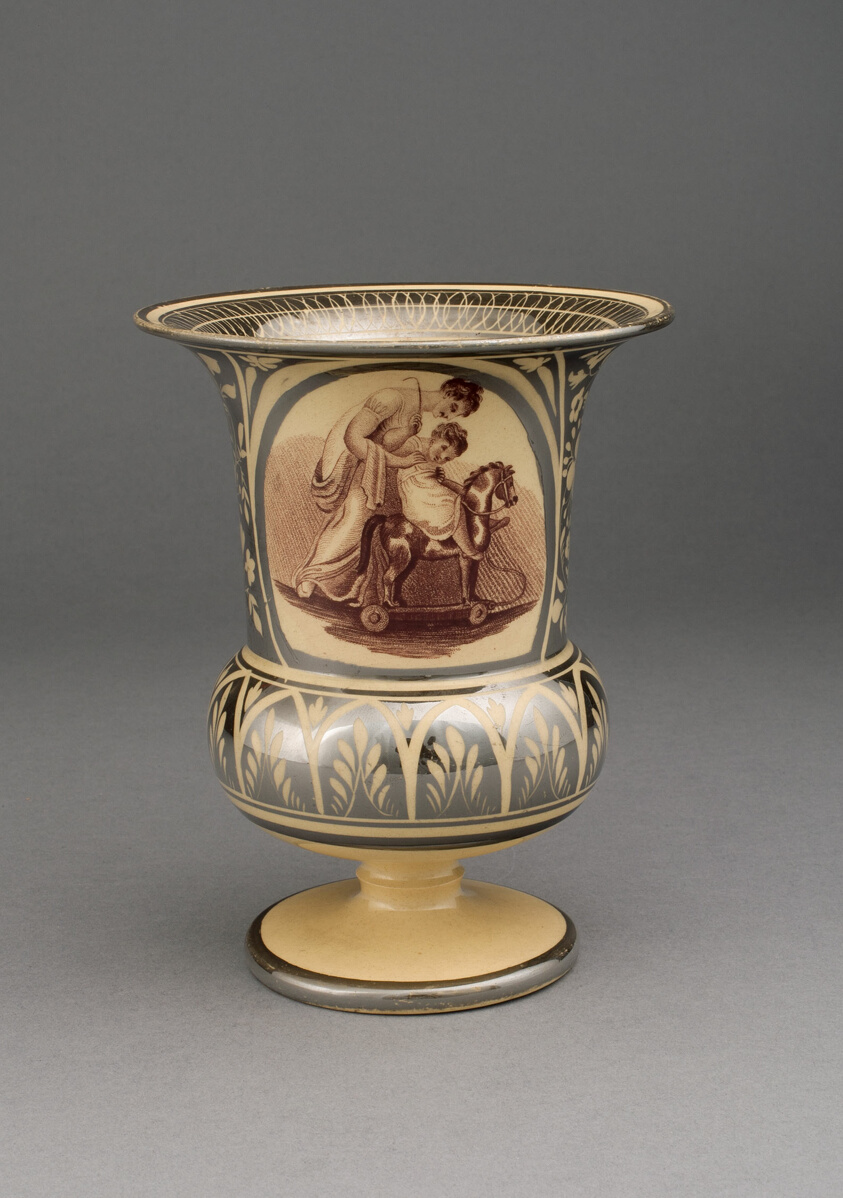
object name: Ceramics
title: Vase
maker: England, Leeds; With Transfer Decoration after Adam Buck; Irish, 1759-1833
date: c. 1820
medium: Earthenware with silver lustre decoration, monochrome brown, and yellow ground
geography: Leeds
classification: vase; vessel; ceramics; european decorative arts; earthenware